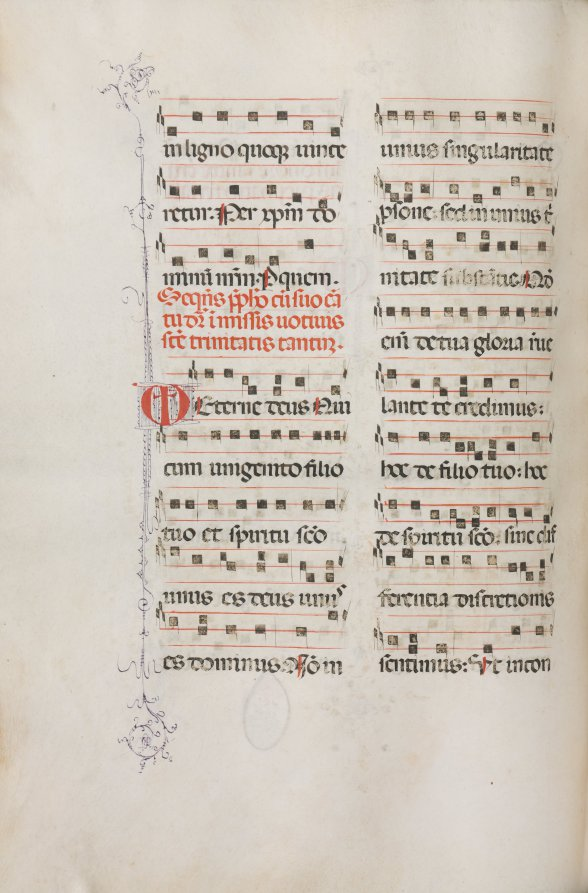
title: Missale: Fol. 182v: Music for various ordinary prayers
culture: Italy, Perugia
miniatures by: Bartolommeo Caporali (Italian, c. 1420–1503)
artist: assisted by Giapeco Caporali (Italian, d. 1478)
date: 1469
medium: ink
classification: Bound Volume